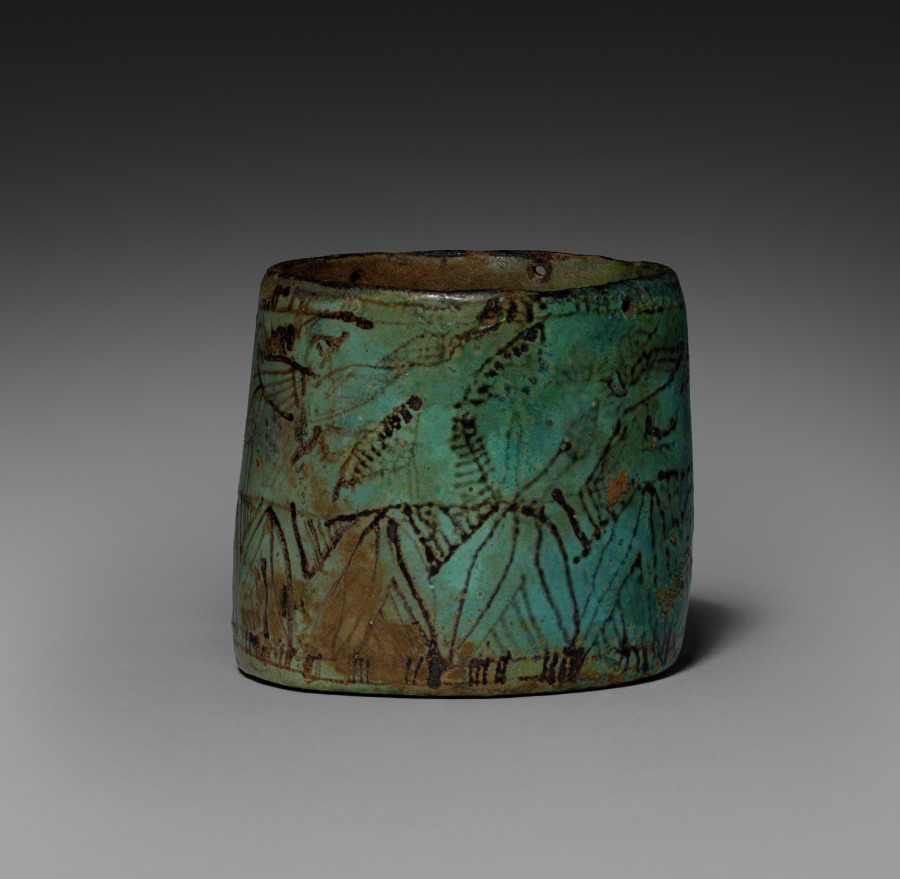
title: Pyxis with Lid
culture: Egypt, Middle Kingdom (2040–1648 BCE)–New Kingdom (1540–1069 BCE)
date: c. 1901–1525 BCE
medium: turquoise faience with black decoration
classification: Vessels